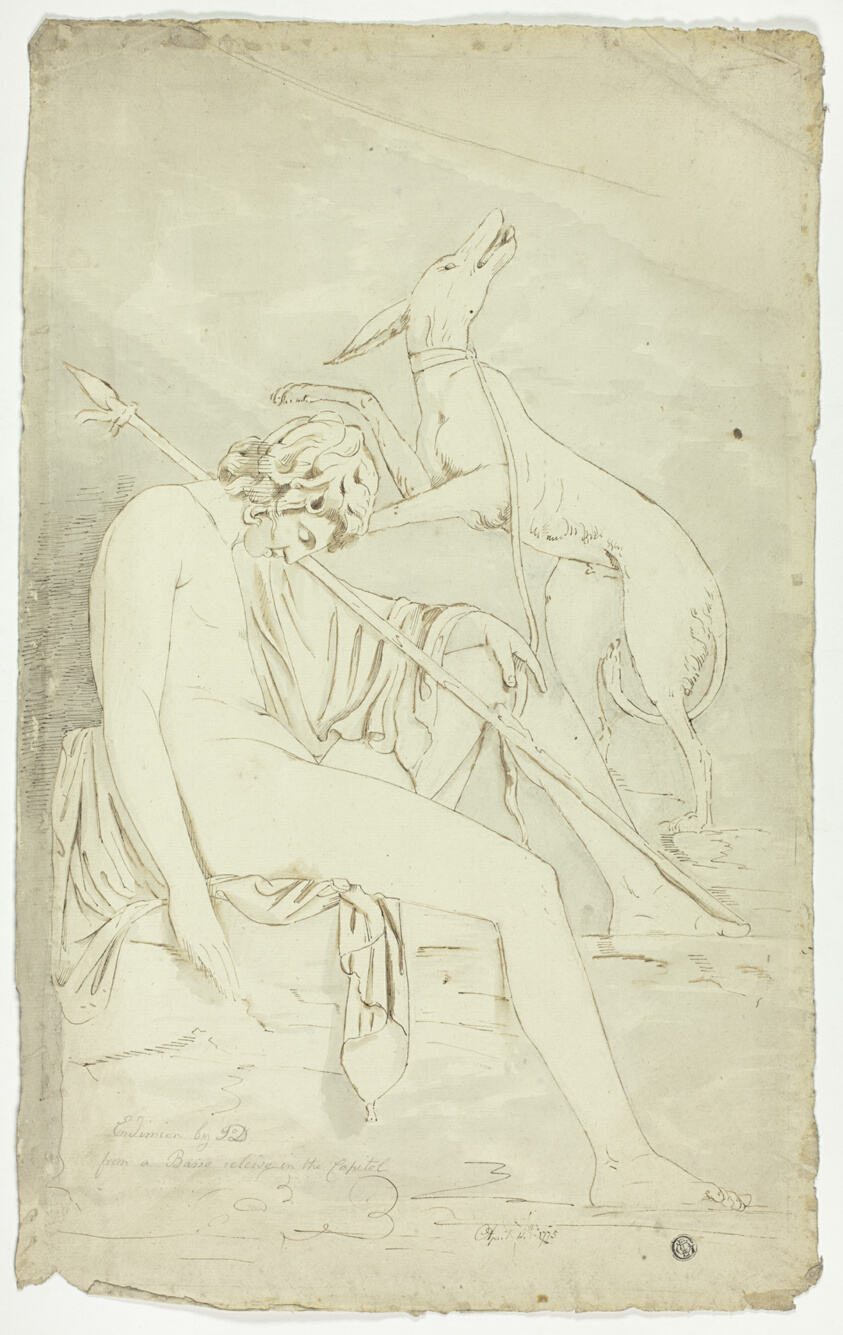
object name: Drawing and Watercolor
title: Ancient Bas-Relief of Sleeping Hunter and Dog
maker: John Downman (English, 1750-1824)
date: 1775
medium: Pen and brown ink and brush and gray wash, over traces of black chalk, on ivory laid paper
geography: England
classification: pen and ink drawings; drawings (visual works); prints and drawing; brush and wash; paper